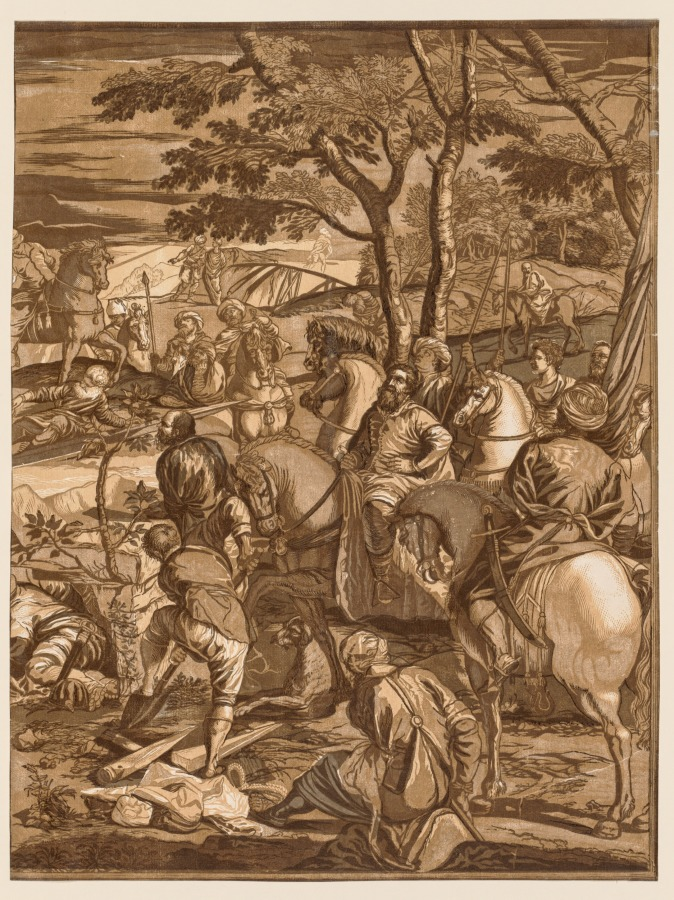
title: Crucifixion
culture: England, 18th century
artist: John Baptist Jackson (British, 1701-c. 1780)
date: 1741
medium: chiaroscuro woodcut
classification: Print